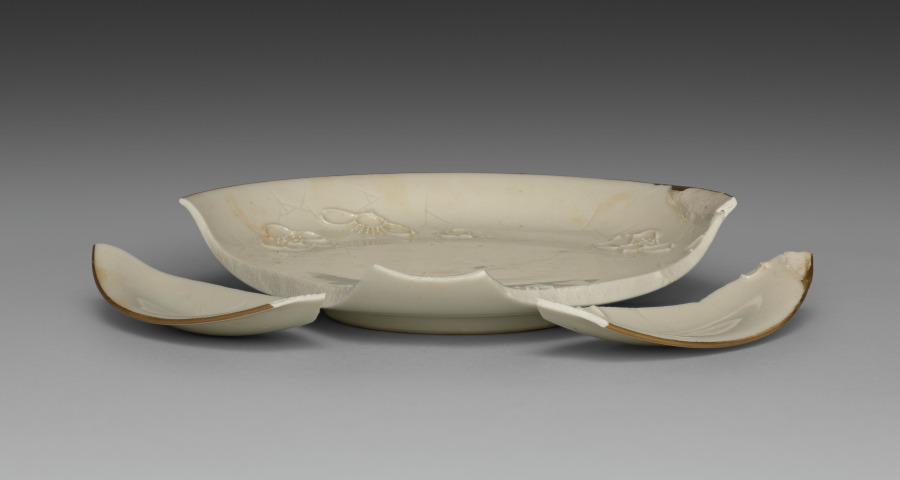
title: Medium-sized Dish from Dining Set with Plum Blossoms and Cracked-Ice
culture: Japan, Meiji period (1868–1912)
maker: Seifū Yohei II (Japanese, 1844–1878)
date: c. 1875–78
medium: Porcelain with molded designs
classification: Ceramic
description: Each item in this set has a delicate low-relief design of flowering plum branches over scattered, intersecting lines meant to resemble the cracked-ice surface of a frozen body of water and is signed on the base in gold pigment. While Yohei II produced many fine works in underglaze blue, like those produced by Kiyomizu Shichibei, he also made works in quite different styles later in his career, from the early 1870 s. In 1873, he was appointed purveyor to the Industrial Center of Kyoto Prefecture, a designation associated with Kyoto’s efforts to reach an international market through the port of Kobe; and from 1875 until his death, he was involved in national-level projects to present Japanese ceramics across the world. It was during this period that Yohei III was apprenticed to Yohei II, and it has been suggested that this set may in fact be an early example of Yohei III’s work, which he signed with his teacher’s name. Decorated with flowers resembling Japanese textile motifs, the set calls to mind the design of Yohei II’s pair of vases with plum blossoms in the Victoria and Albert Museum. Here, the elaborate trees created for a formal public exhibition setting have been translated into the approachable blossoms of the genteel domestic environment. While the designs are consistent across the pieces, each raised flower petal and pistil and each incised line in the ice was done by hand, so the cups, bowls, and dishes are similar yet unique. The bottoms of two boxes once identified the set’s owner, but the information has been deliberately obscured with black ink. However, inscriptions still visible appear to indicate two occasions, once at the end of July 1886 , and once again in June 1916 , when parts of the set were requested from Hokura in Niigata Prefecture. The location corresponds to a neighborhood in the present-day city of Jōetsu. The surname Tsuji 辻 also appears on a paper tag affixed to one of the box cloths. Future research may possibly reveal more about their provenance. A vase by Yohei III in a private collection combines the formal grandeur of the Yohei II vases in the Victoria and Albert Museum with the gentler design of this dining set, placing flowering plum trees against soft, scalloped-edge clouds resembling those in golden screens.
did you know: The dining wares have a creamy white coloration that the four boxes containing them identify as Korean in style.